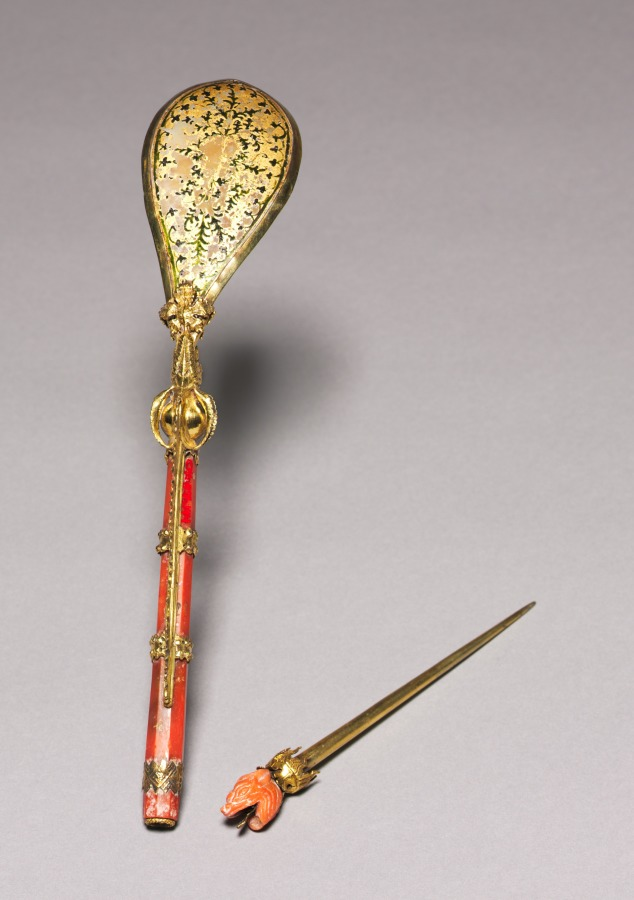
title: Spoon with Detachable Pick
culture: Italy, Venice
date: c. 1500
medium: enameled shell and coral, gilt-silver mounts; detachable pick with dragon's head finial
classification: Metalwork